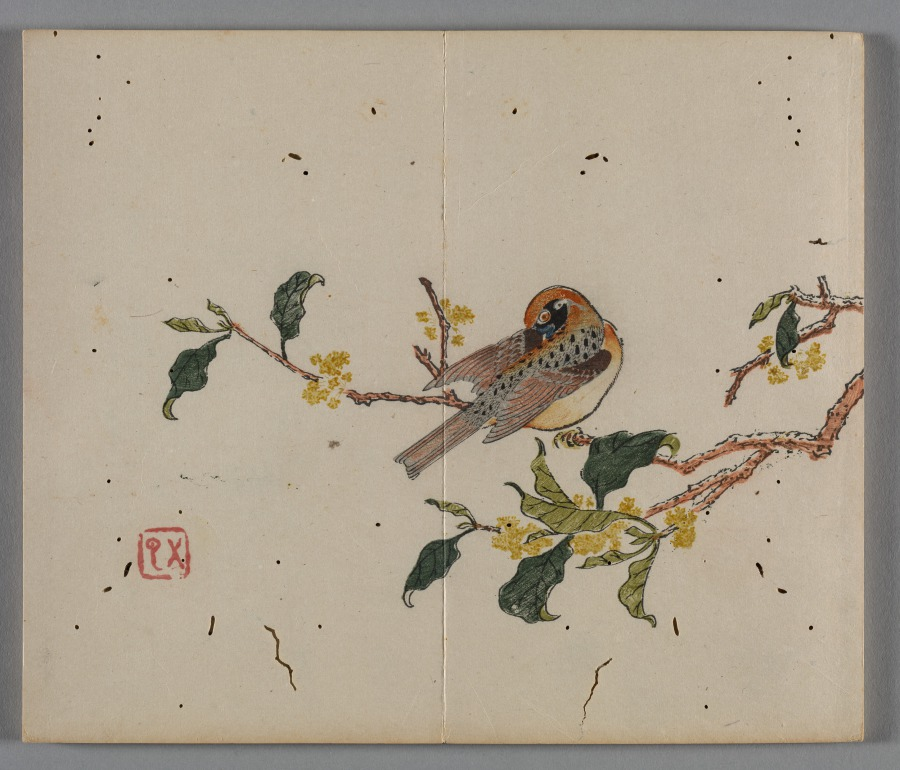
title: Ten Bamboo Studio Painting and Calligraphy Handbook (Shizhuzhai shuhua pu): Birds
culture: China, Qing dynasty (1644-1911)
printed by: Hu Zhengyan (Chinese, c. 1584–1674)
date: 1633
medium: Woodblock-printed book; ink and colors on paper; first edition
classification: Print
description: Color printing reached a level of perfection in the early 1600s, as seen in this Ten Bamboo Studio Collection of Calligraphy and Painting and the Mustard Seed Garden Manual of Painting (printed 1679 and 1701). The painterly quality, precision in registering (aligning) the woodblocks, and harmonious colors made them the most successful color print editions in Chinese history. Both editions were printed and compiled in Nanjing, spread nationwide, and had a great impact on the arts in Japan and Korea.